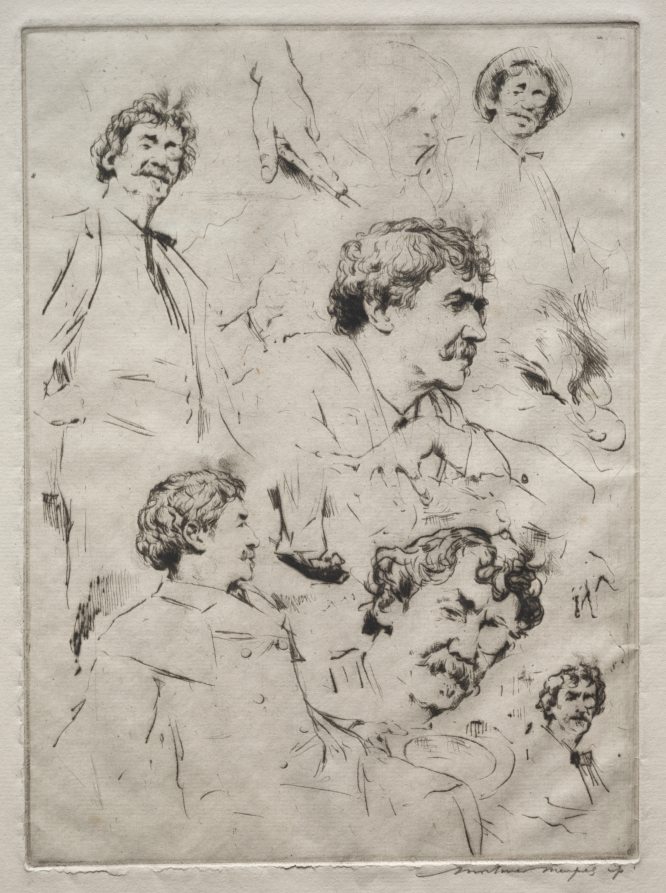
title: Six Faces of Whistler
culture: England, 19th-20th century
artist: Mortimer Menpes (British, 1860–1938)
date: c. 1902–3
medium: drypoint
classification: Print